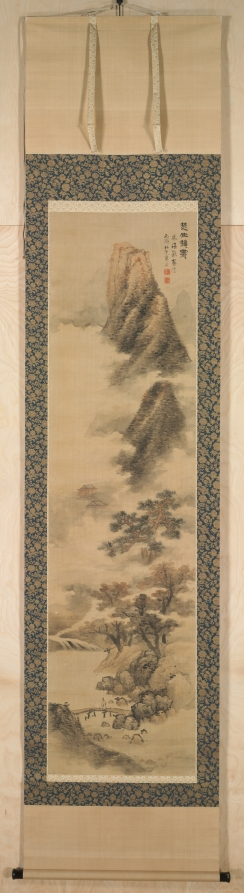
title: Clearing Autumn Mists in the Chu Mountains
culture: China, Ming dynasty (1368–1644)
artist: Lan Ying (Chinese, 1585–after 1664)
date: 1600s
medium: hanging scroll, ink and light color on silk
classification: Painting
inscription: Artist's inscription, signature, and 2 seals: Clearing Autumn Mists in the Chu Mountains, painted in the manner of Mi Haiyue [Mi Fu]. Xihu waishi, Lan Ying [seals] Lan Ying zhiyin; Shiwu toutuo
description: In his inscription Lan Yin states that he uses Mi Fu’s methods to depict this landscape. The ovoid "Mi" dots—Mi Fu’s brush idioms—are applied to give shape to the cloud-enveloped mountains and foreground tree grove for self expression. Engaging in the process of fang (imitation), he acquired the methods of various schools and masters to expand his technical range for creative transformations. Lan Yin developed his unique style and inspired major artists like Liu Du and Chen Hongshou.